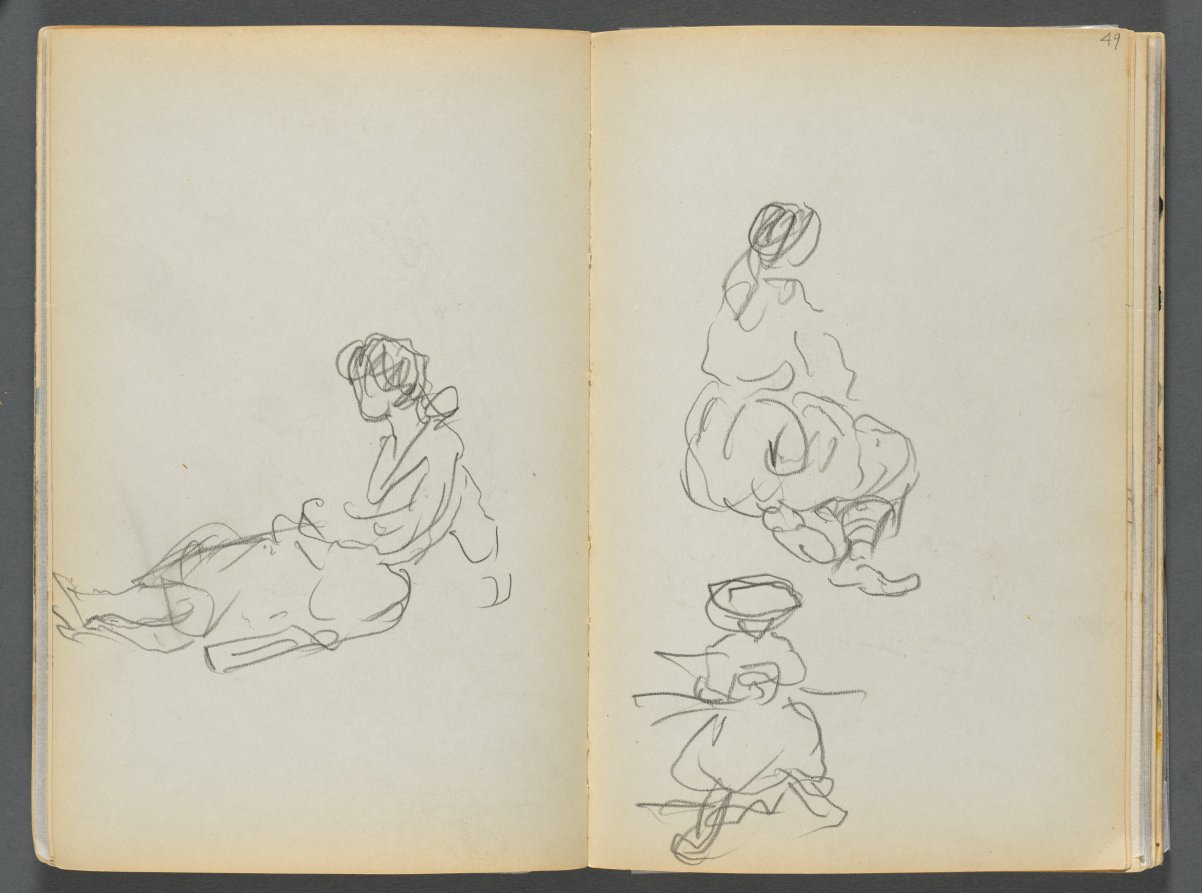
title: Sketchbook- The Granite Shore Hotel, Rockport, page 048 & 49: Seated Female Figures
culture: America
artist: Maurice Prendergast (American, born Newfoundland [now Canada], 1858–1924)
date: 1905–10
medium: graphite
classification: Bound Volume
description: This sketchbook contains 72 pages of pencil drawings and 9 watercolors of Cape Ann. On the inside of the cover Prendergast wrote the address of the Granite Shore Hotel in Rockport, Massachusetts.